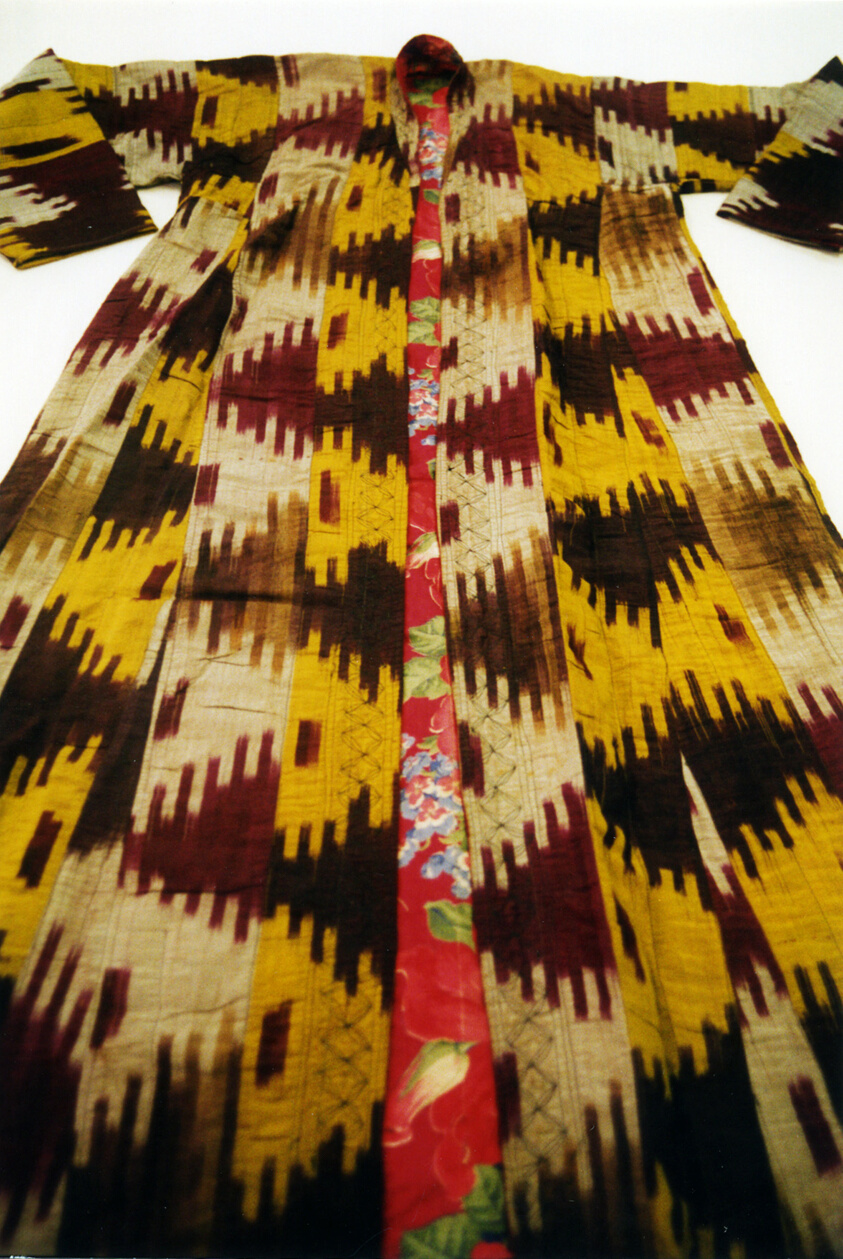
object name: Textile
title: Chapan or Khalat (Man's Outer Robe)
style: turkoman, central asian, asian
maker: Probably Central Asia, possibly Turkmenistan, Turkoman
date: 19th century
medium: Silk, warp-resist dyed (ikat) plain weave; center front and hem faced with cotton; machine embroidered with cotton in straight stitches; lined with cotton, plain weave; block printed; silk padding and cotton, machine stitching in cotton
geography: Central Asia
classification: textile; weaving - printed